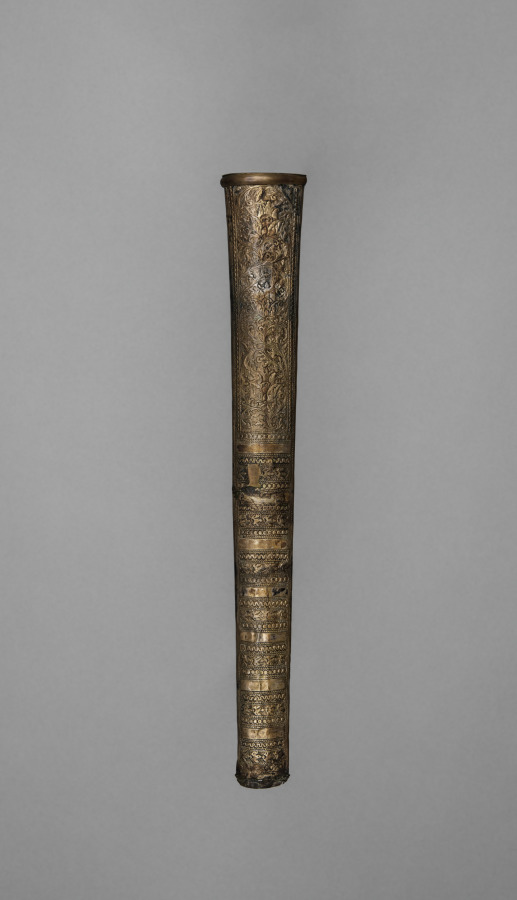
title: Scabbard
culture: Sumatra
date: 1500s–1800s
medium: Copper alloy, silver gilt, wood, and textile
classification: Arms and Armor